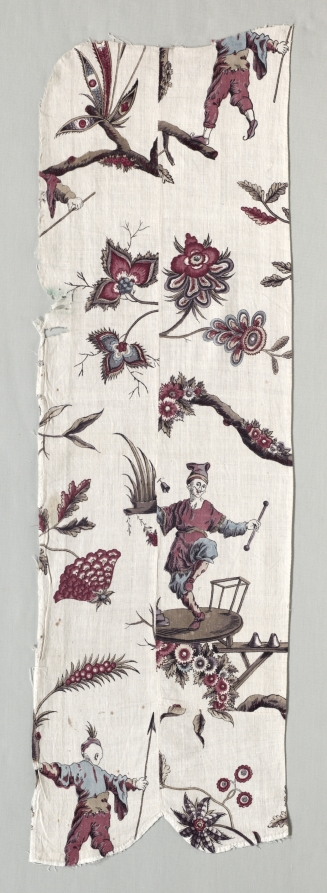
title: Woodblock Printed Textile Fragments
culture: France, late 18th century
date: c. 1785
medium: woodblock print on cotton and linen mixed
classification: Textile